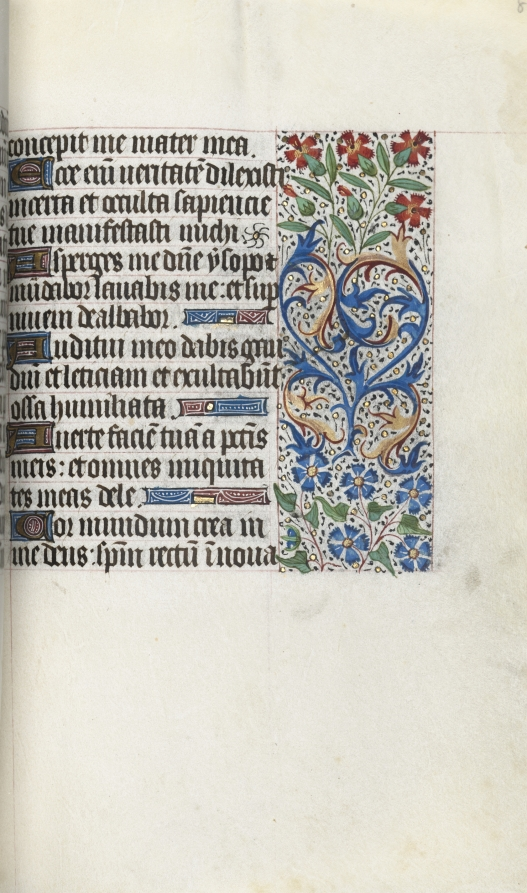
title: Book of Hours (Use of Rouen): fol. 86r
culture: France, Rouen, 15th century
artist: Master of the Geneva Latini (French, active Rouen, 1460–80)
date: c. 1470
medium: ink, tempera, and gold on vellum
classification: Bound Volume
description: In the late 1400s and early 1500s Rouen was an established and important center of book production. The city’s cathedral had a wealthy chapter that spent large sums of money to commission books and to maintain its extensive library. The stationers and booksellers would have likely been concentrated in or near the cathedral precinct. This artist, named after a manuscript now in Geneva, was Rouen’s principal illuminator during the second half of the 1400s.